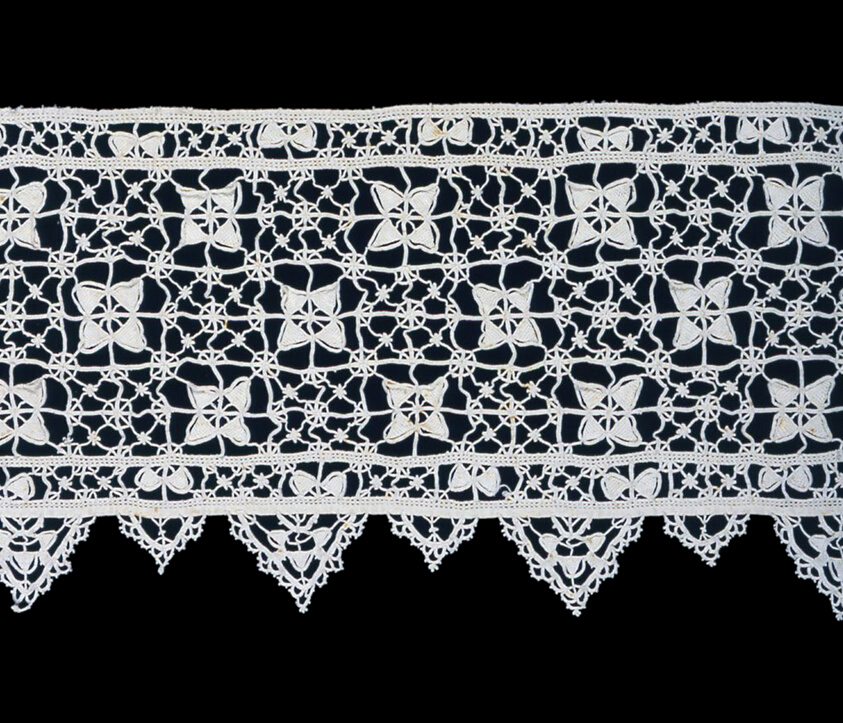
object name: Textile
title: Border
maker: Italy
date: 1875/1900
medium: Linen, needle lace worked on a plain weave cut and drawn thread work grid; embroidered in double hem, hem and overcast stitches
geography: Italy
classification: textile; lace - needle